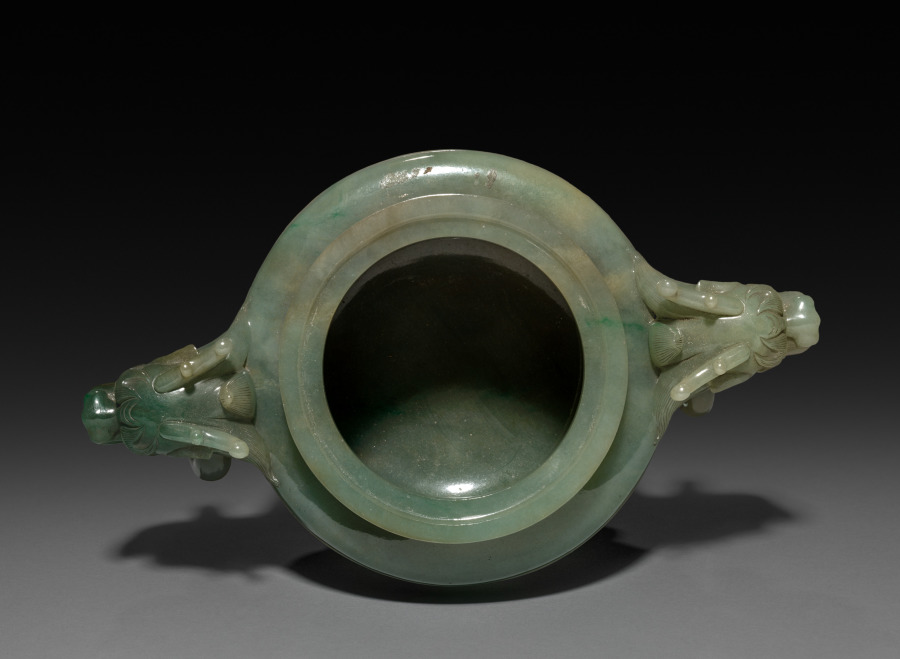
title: Koro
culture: China, Qing dynasty (1644–1911), Qianlong reign (1736–95)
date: 1736–95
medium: jade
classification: Jade